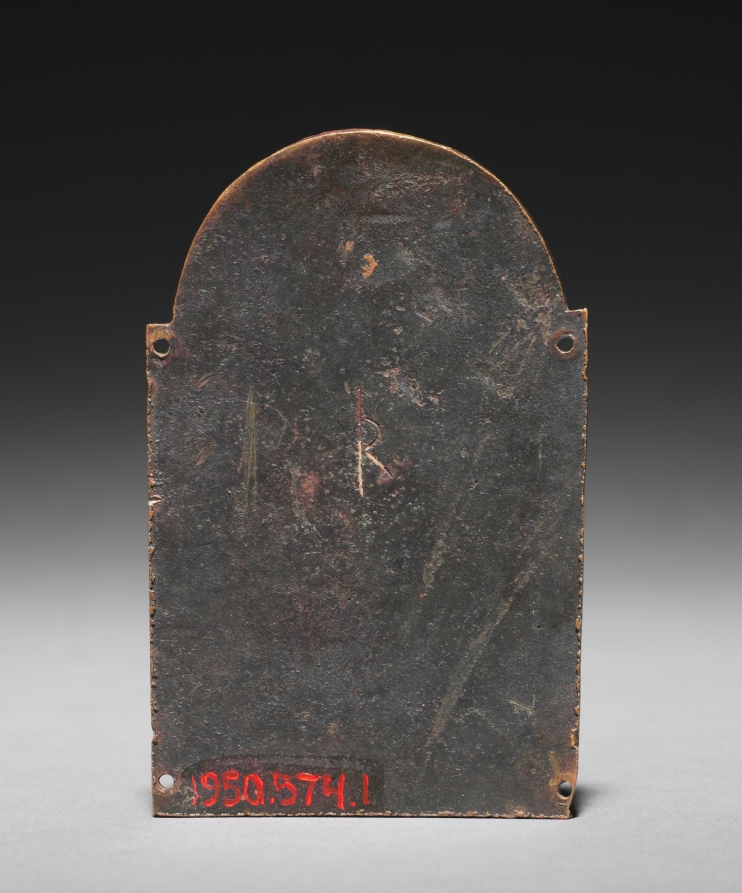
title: Plaque: Seated Prophet from a Reliquary Shrine: Esaias (Isaiah)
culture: Germany, Lower Saxony, Hildesheim, Romanesque period, 12th century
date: c. 1170–80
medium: gilded copper, champlevé enamel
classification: Enamel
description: Once used as decorations for a reliquary shrine, each enamel plaque represents a biblical prophet: Isaiah, Obadiah, Elisha, and Hosea. Fine gold dots punctuate dark blue backgrounds. Typical of Hildesheim enamels, this detailing creates the illusion that the prophets sit against star-studded twilight skies.